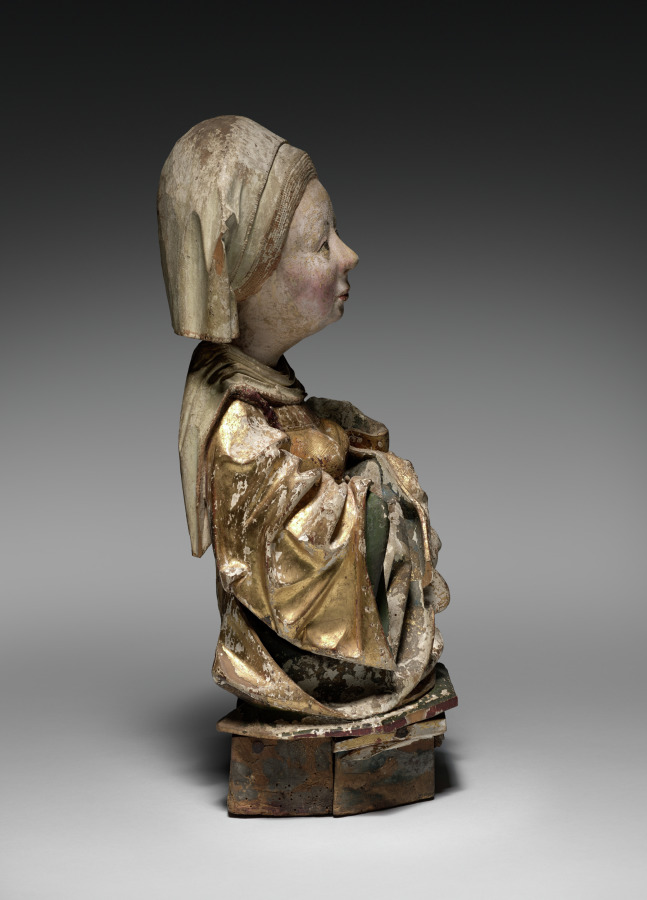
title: Female Bust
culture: Austria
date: c. 1470–1500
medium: Painted and gilded lindenwood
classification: Sculpture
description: This female bust is part of a series of three in the museum's collection. The identity of the figures has been speculated by scholars but without resolution. Because this and the other female busts in the series do not retain their attributes, it is difficult to know their original purpose. It is possible that they may have once formed a group of female saints from the predella of a large altarpiece. Since the sculpture is not carved in the round, this hypothesis has merit. Another recent proposal is that this and the other sculptures may be from a series of female busts representing the wise and foolish virgins referenced in Matthew 25:1-13, a parable by Jesus admonishing listeners to be spiritually prepared.